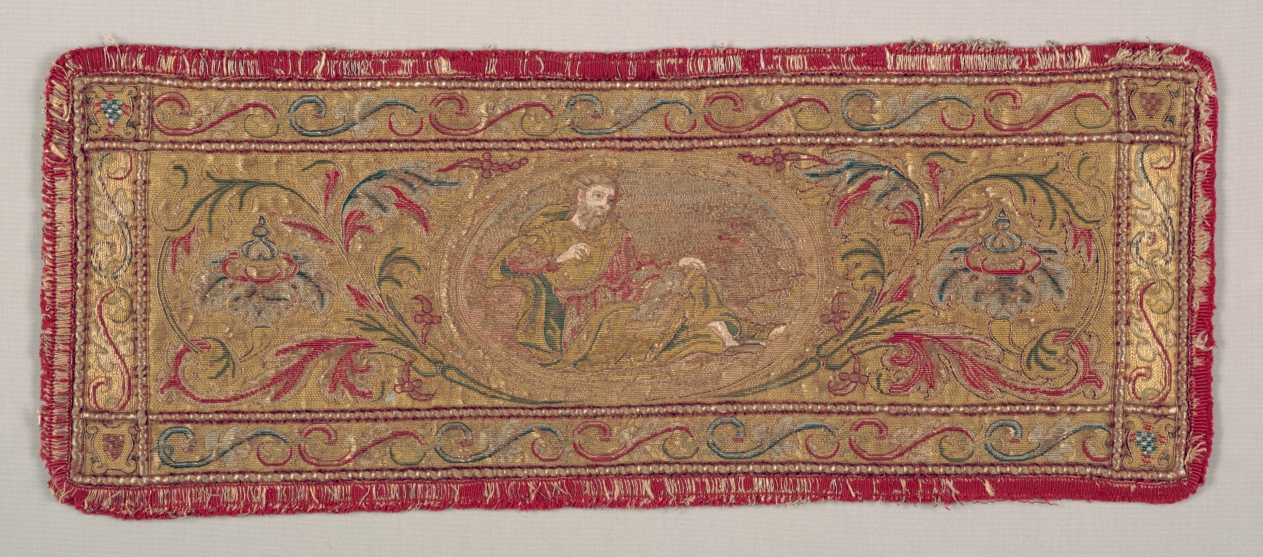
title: Apparel from a Dalmatic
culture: Italy, first half of the 16th century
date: 1500–1550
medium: Plain-weave linen with silk and metal thread embroidery; or nué (shaded gold)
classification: Embroidery